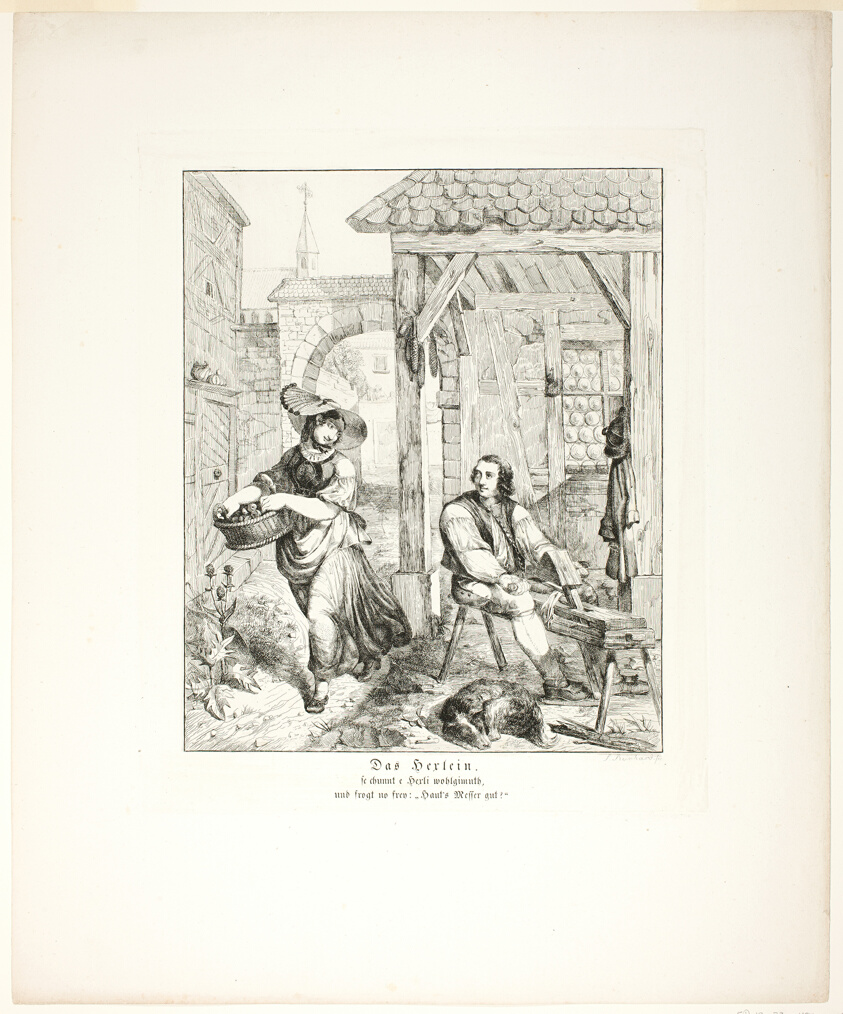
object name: Print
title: The Little Witch (Das Hexlein), plate four from the series Poems in the Dialect of the Upper Rhine Region (Zehn Blätter Zu Hebels Alemannischen Gedichten)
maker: Sophie Reinhard (German, 1777-1843); published by Mohr und Winter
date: 1820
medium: Etching on cream wove paper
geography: Germany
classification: etching; print; prints and drawing